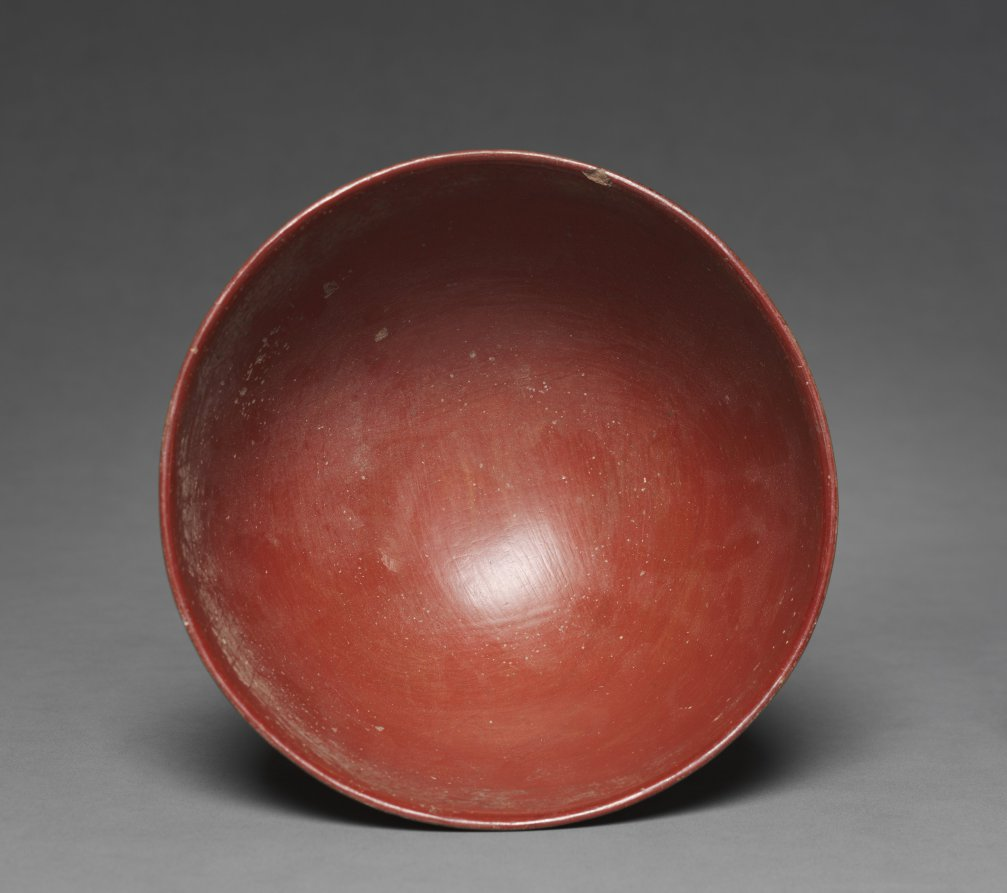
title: Pedestal Bowl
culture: Mexico, Cholula?, Mixteca-Puebla Style, 10th-16th century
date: c. 900–1519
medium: earthenware with colored slips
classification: Ceramic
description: The nobility may have used these goblets for a chocolate beverage or for pulque, made from the fermented sap of the maguey cactus. Both are painted with the precision and brilliant colors for which the Mixteca-Puebla style is renowned, and they carry some of the same motifs, such as the band of stylized animal heads at the top. The smaller bowl has a rattle base.